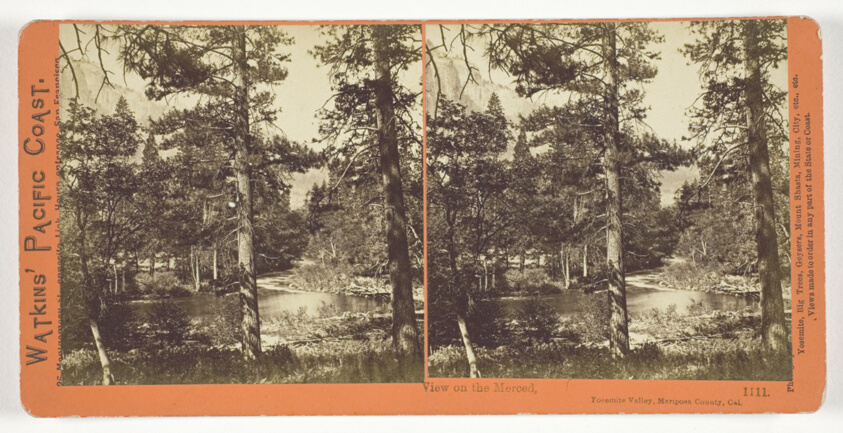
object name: Photograph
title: View on the Merced, Yosemite Valley, Mariposa County, Cal., No. 1111 from the series "Watkins' Pacific Coast"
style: 19th century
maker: Carleton E. Watkins; American, 1829-1916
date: 1861/76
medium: Albumen print, stereo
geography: United States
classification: stereograph (albumen); albumen silver print; photographic process; photography; photograph